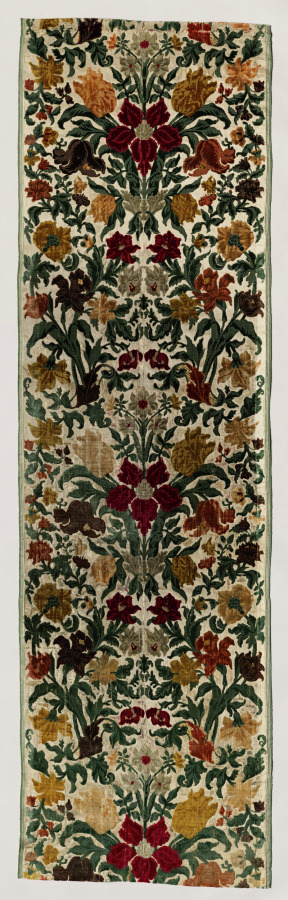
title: Length of Floral Velvet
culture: Italy, Genoa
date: 1600s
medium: velvet (cut, uncut, voided); silk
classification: Velvet